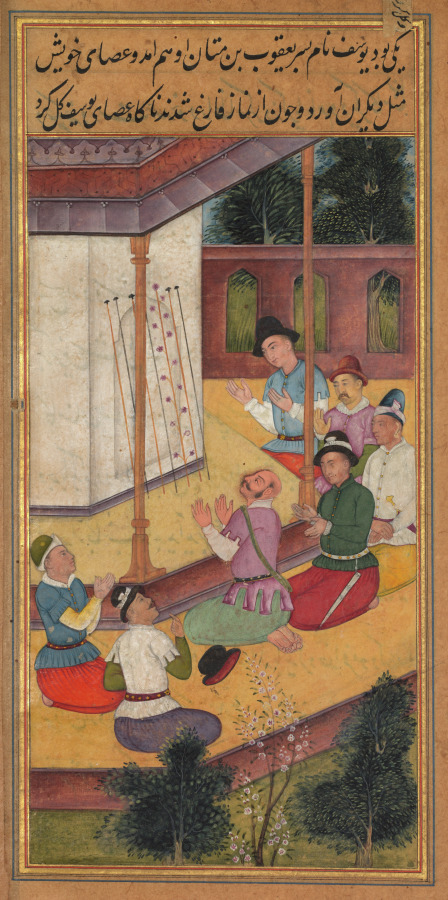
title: The Flowering of Joseph’s Rod (folio 11 verso), from a Mirror of Holiness (Mir’at al-quds) of Father Jerome Xavier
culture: Mughal India, Allahabad, made for Prince Salim (1569–1627)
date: 1602–04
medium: Gum tempera, ink, and gold on paper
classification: Manuscript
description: Joseph kneels outside the temple, among, according to the text, a group of unmarried men. The artist has depicted them dressed like contemporary Portuguese merchants wearing button-down belted shirts. The men had been ordered by God to bring their staffs to the temple; the one whose staff blossoms would become the husband of Mary. Joseph quivers with astonishment as his staff blooms; his hat falls to the ground as though it suddenly came off his head in surprise. Father Jerome’s source for this episode was the apocryphal Gospel of Pseudo-Matthew.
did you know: The suitors in this scene are dressed as contemporary Portuguese men, but have followed the Muslim practice of removing their shoes while in the temple.